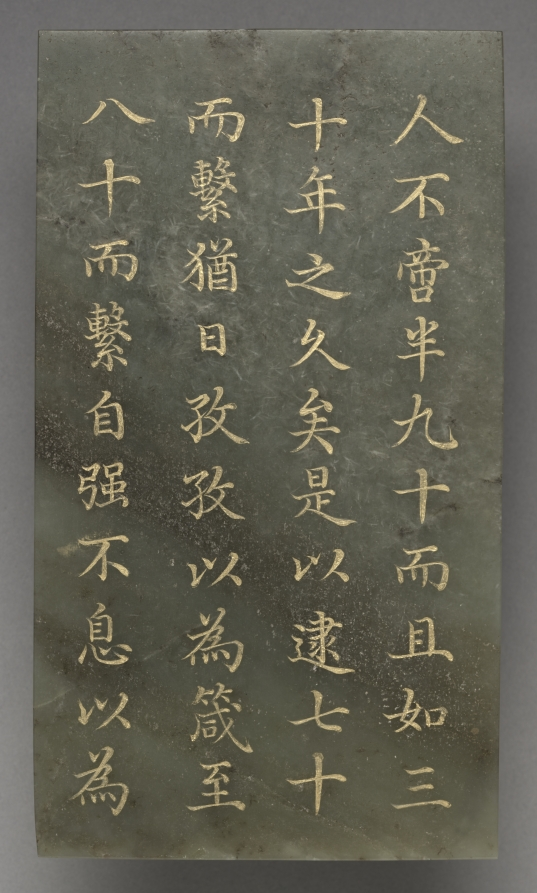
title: Tablet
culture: China, Qing dynasty (1644–1911), Qianlong reign (1736–95)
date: 1778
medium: jade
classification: Jade